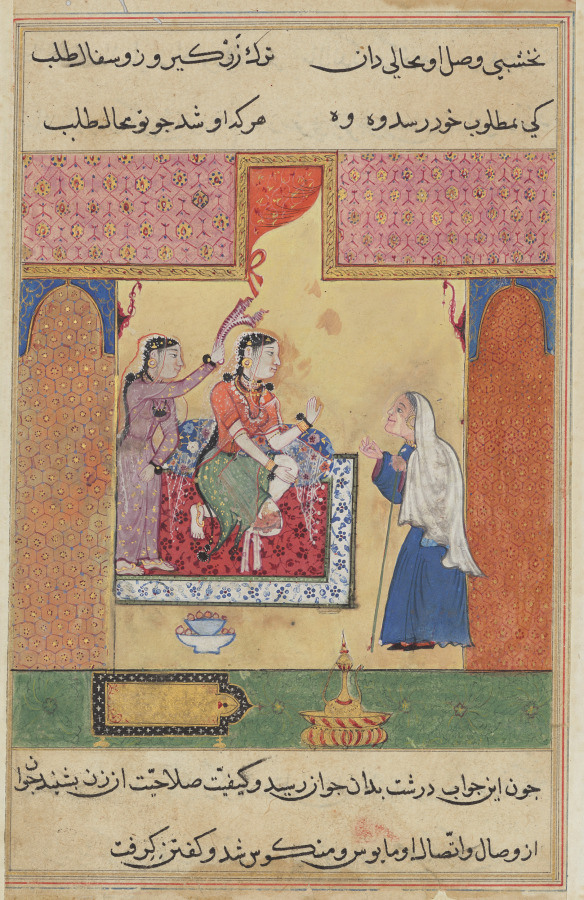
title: The old procuress conveys the young man’s message of love to Mansur’s wife, from a Tuti-nama (Tales of a Parrot: Seventeenth Night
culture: Mughal India, court of Akbar (reigned 1556–1605)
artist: Sravana (Indian)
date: c. 1560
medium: gum tempera, ink, and gold on paper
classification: Painting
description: When a lascivious young man learns of the beauty and virtue of the merchant Mansur’s wife, he becomes obsessed with her. While Mansur is away on a long journey, the man decides to profess his love for the woman through a messenger. Here Mansur’s wife, seated on an arabesque-patterned carpet, rebuffs the young man’s advances and sends the procuress away.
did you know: The golden mihrab next to vessels for ritual cleansing points toward Mecca, emphasizing the wife’s piety.